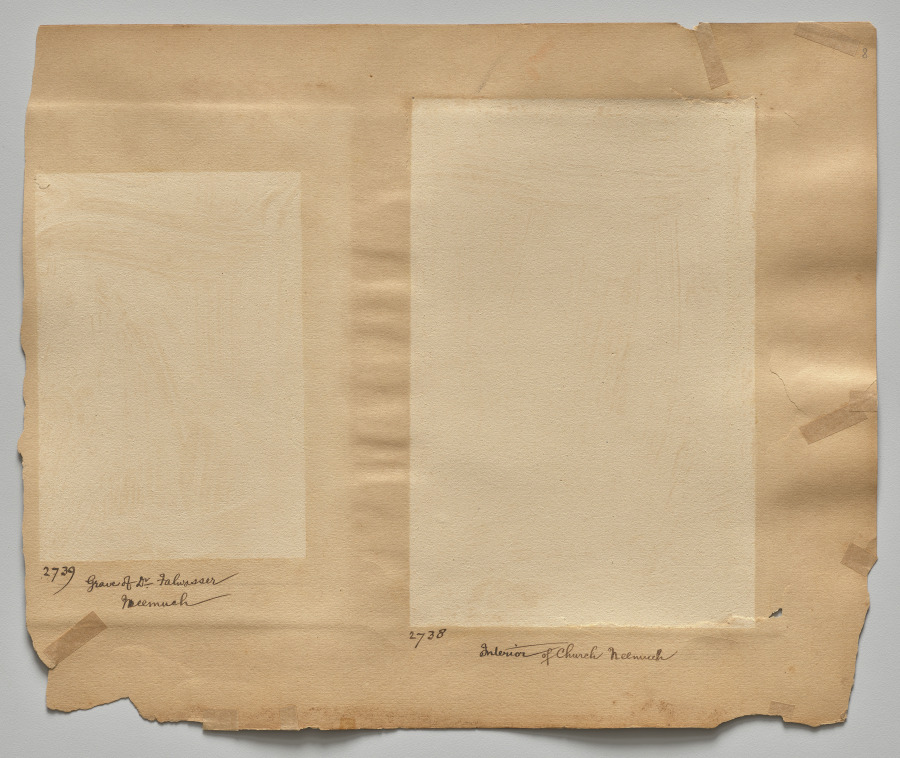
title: Interior of Church, Neemuch (recto, right); Grave of Dr. Falwasser, Neemuch (recto, left); Indian Lady 250 BC (verso, right)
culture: India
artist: Raja Deen Dayal (Indian, 1844–1905)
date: c. 1882–87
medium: albumen print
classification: Photograph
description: These photographs are part of an album, now disassembled, of around 105 photographs taken in India between 1885 and summer 1887 that provide glimpses into the lives of the British colonial elite and royal and upper-class Indians. The museum holds another group of 37 pictures from this album (2016.266), which was probably commissioned by a British civil servant visiting or working in India around 1888 as a personal souvenir of his experiences there.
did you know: Raja Deen Dayal is regarded now, and was considered during his lifetime, to be India’s most important 19th-century photographer.